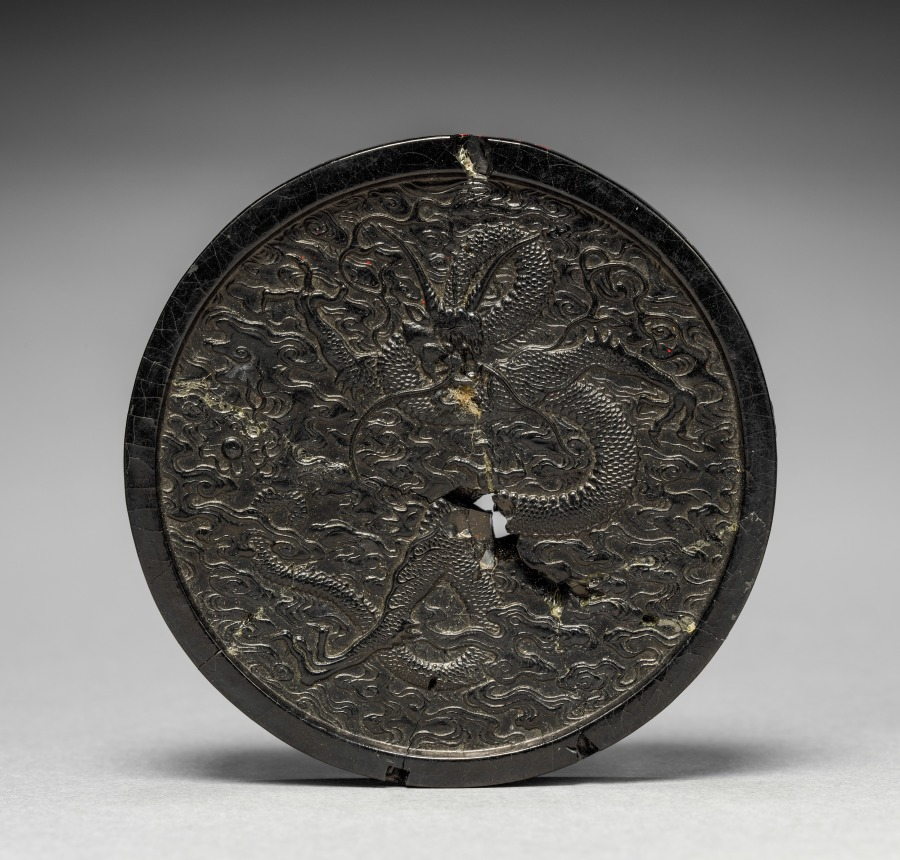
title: Ink Cake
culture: China, Ming dynasty (1368–1644)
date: 1368–1644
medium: ink cake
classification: Miscellaneous